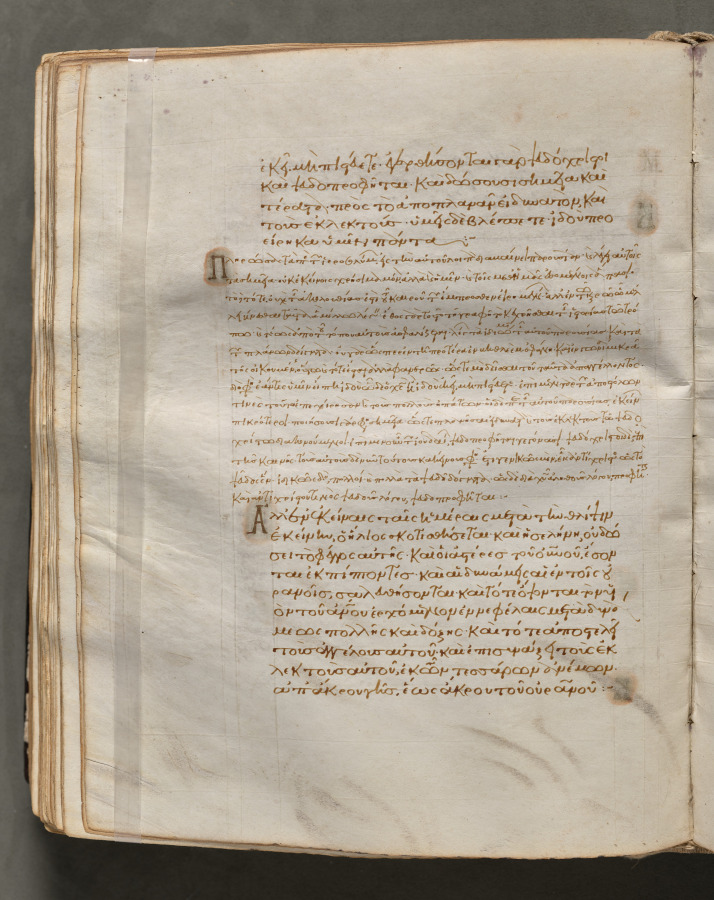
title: Text, folio 183 (verso), from a Gospel Book with Commentaries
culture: Byzantium, Constantinople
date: c. 1000–1100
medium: ink, tempera, and gold on vellum; leather binding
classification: Bound Volume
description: Each of the four gospels in this book opens on a page with brilliantly illuminated borders depicting the author of the text as well as birds-principally peacocks, symbols of the immortality of the soul-and fountains, representing the fountain of life and the salvation of the soul. This volume consists of 428 leaves with texts in Greek. Its level of sophistication suggests that it was probably written and decorated in a monastery in Constantinople.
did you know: Gospel Books were carried in procession through Byzantine churches.